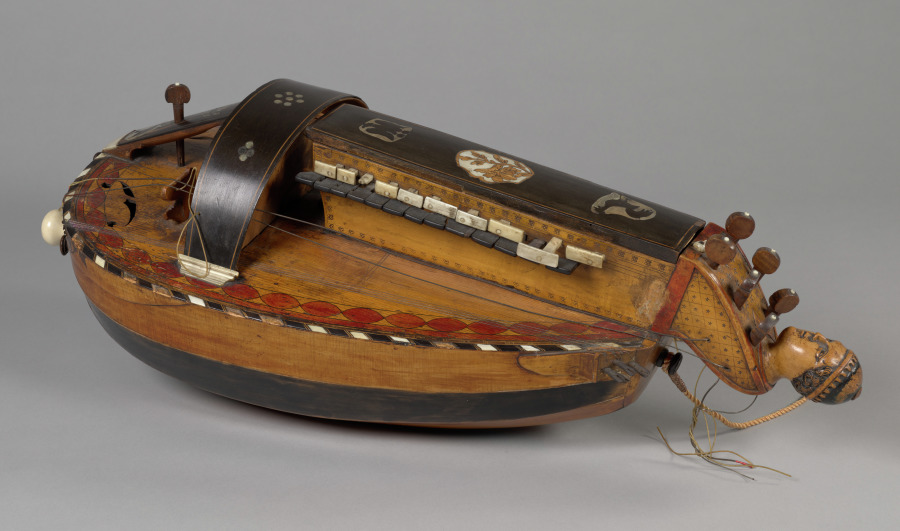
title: Vielle à Roue (Hurdy-Gurdy)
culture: France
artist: Jacques Decante (French, 1808–1884)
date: 1865–70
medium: Wood; mother-of-pearl inlay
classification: Musical Instrument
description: In France, the hurdy-gurdy is known as the vielle à roue (wheel fiddle). This six-stringed musical instrument produces sound by a hand crank-turned wheel that rubs against the strings. The wheel functions much like a violin bow, and single notes sound similar to those of a violin. Melodies are played on a keyboard that presses small wedges against the strings to change their pitch.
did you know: This vielle à roue was made in the French village of Jenzat, which was the manufacturing center for hurdy-gurdies during the 19th century.